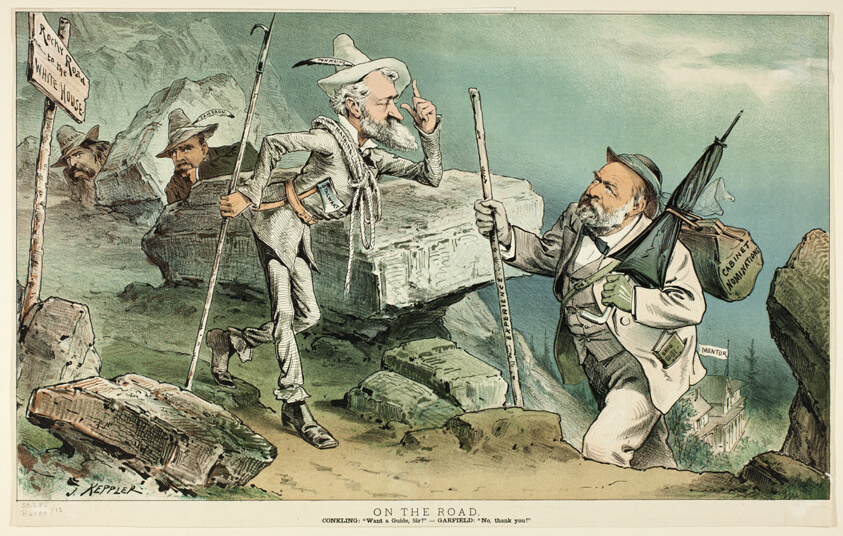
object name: Print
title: On the Road, from Puck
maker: Joseph Keppler (American, 1838-1894)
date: 1881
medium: Color lithograph on newsprint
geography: United States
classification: lithograph; print; prints and drawing